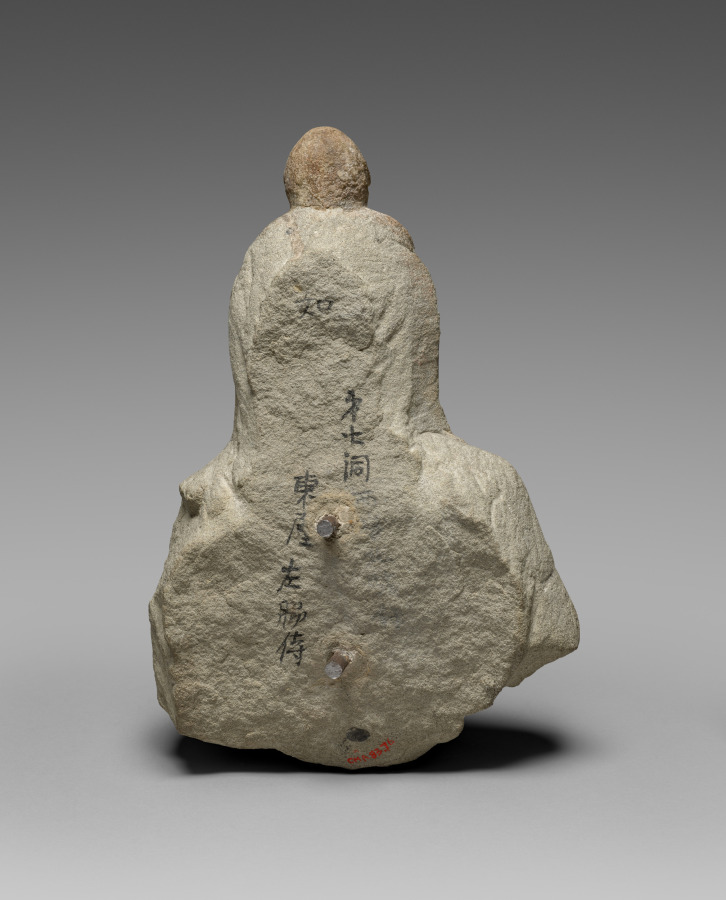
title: Bodhisattva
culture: China, Shanxi province, Taiyuan, Tianlongshan caves, Cave 6, Tang dynasty (618-907)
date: early 700s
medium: light gray limestone with traces of polychromy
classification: Sculpture